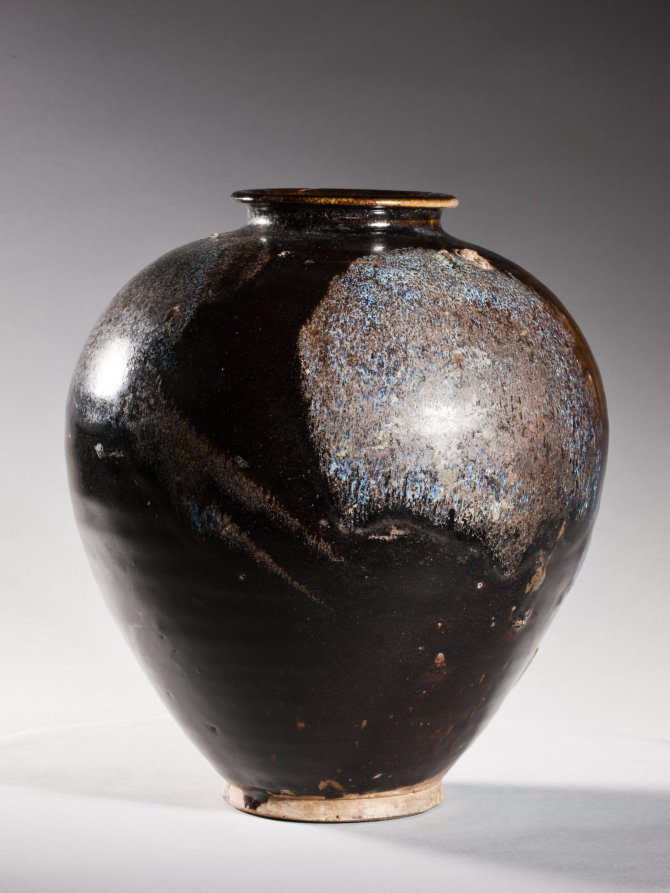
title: Jar: Black Ware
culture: China, Henan province, Huangdao kilns, Tang dynasty (618-907)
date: 700s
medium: glazed stoneware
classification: Ceramic